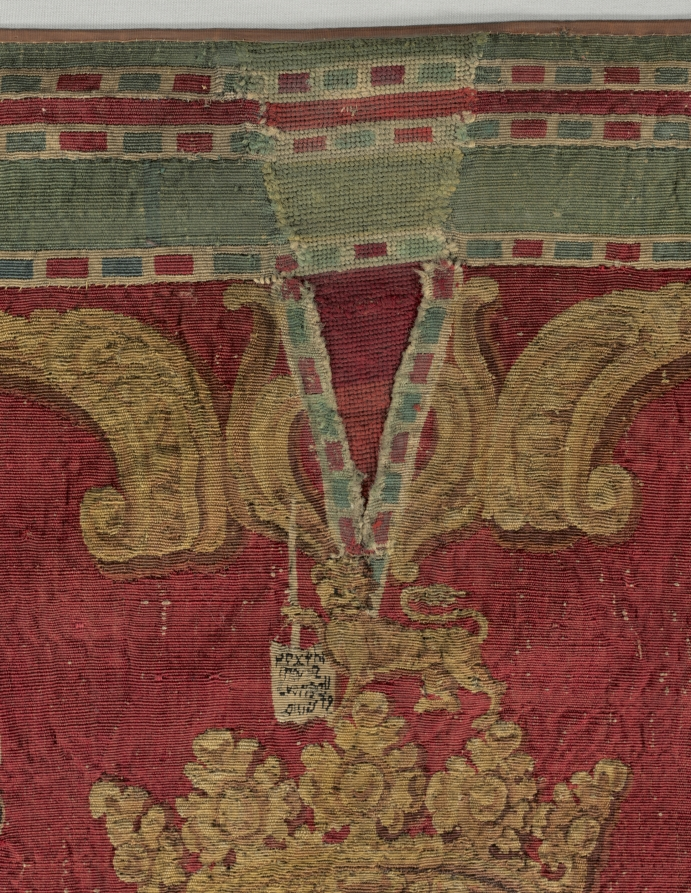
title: Heraldic Tapestry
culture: France, 18th century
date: 1700s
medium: tapestry weave: silk and wool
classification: Tapestry